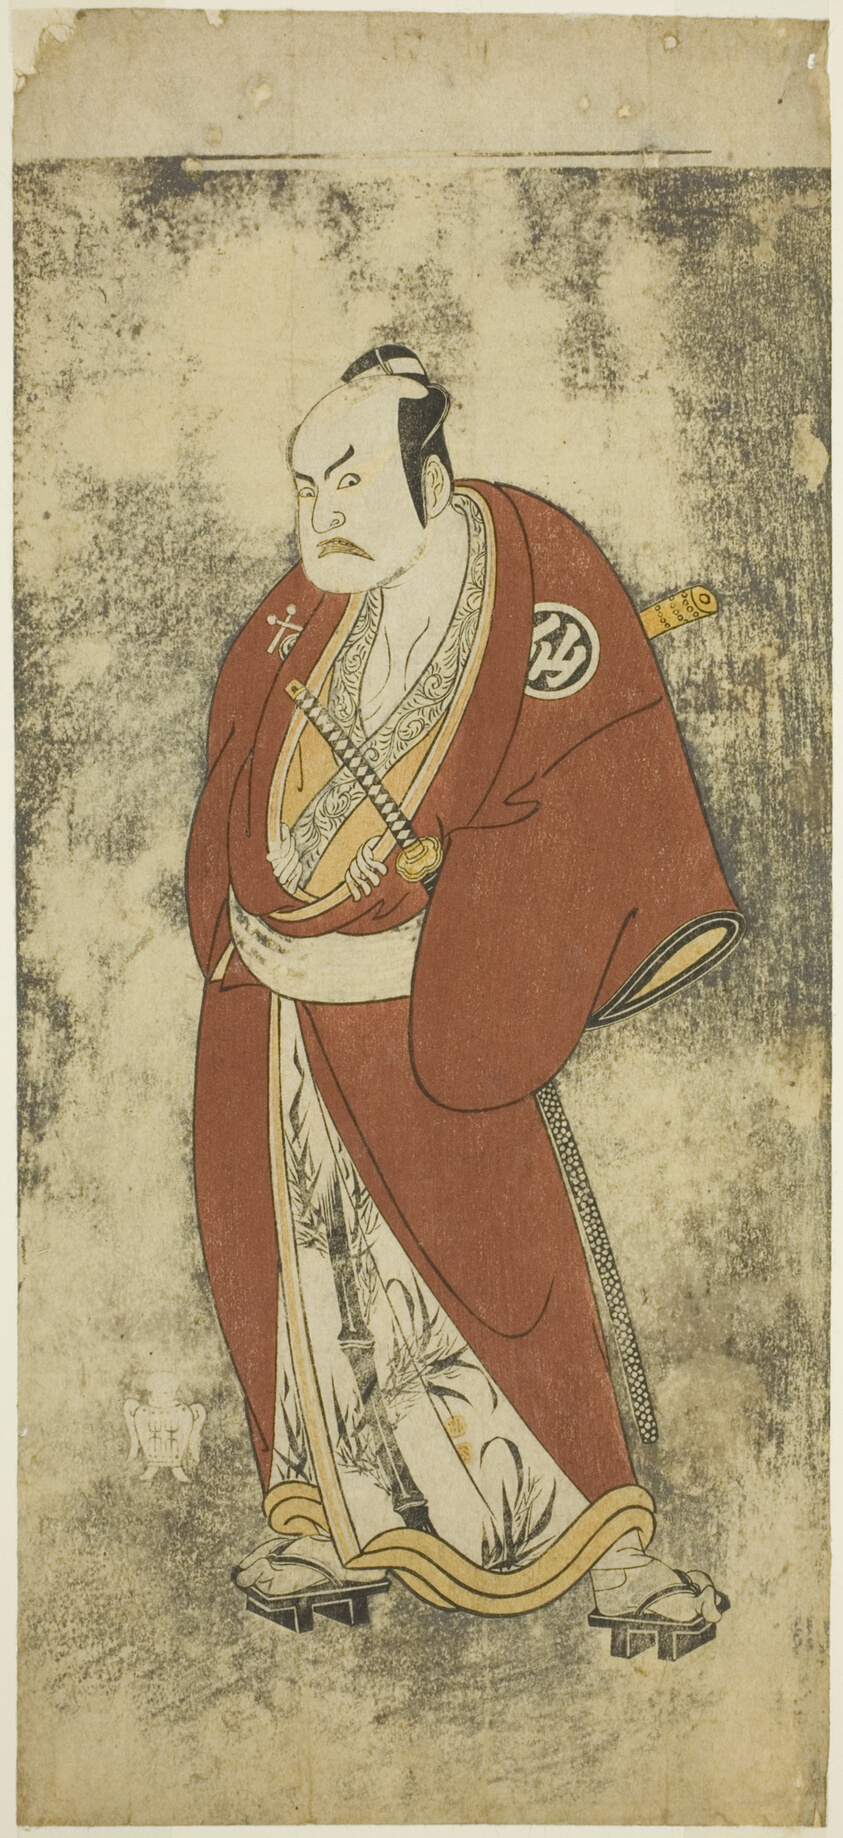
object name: Print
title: The Actor Nakamura Sukegoro II as Kaminari Shokuro in the Joruri "Gonin Otoko" (Five Chivalrous Commoners), Played as One Act in the Ayatsuri Kabuki Ogi (Mastery of the Fan in Kabuki), Performed at the Nakamura Theater from the Twentieth Day of the Seventh Month, 1768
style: Japanese (culture or style)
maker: Attributed to Katsukawa Shunsho 勝川 春章; Japanese, 1726-1792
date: c. 1768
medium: Color woodblock print; hosoban; one sheet of pentaptych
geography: Japan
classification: woodblock print; print; asian art